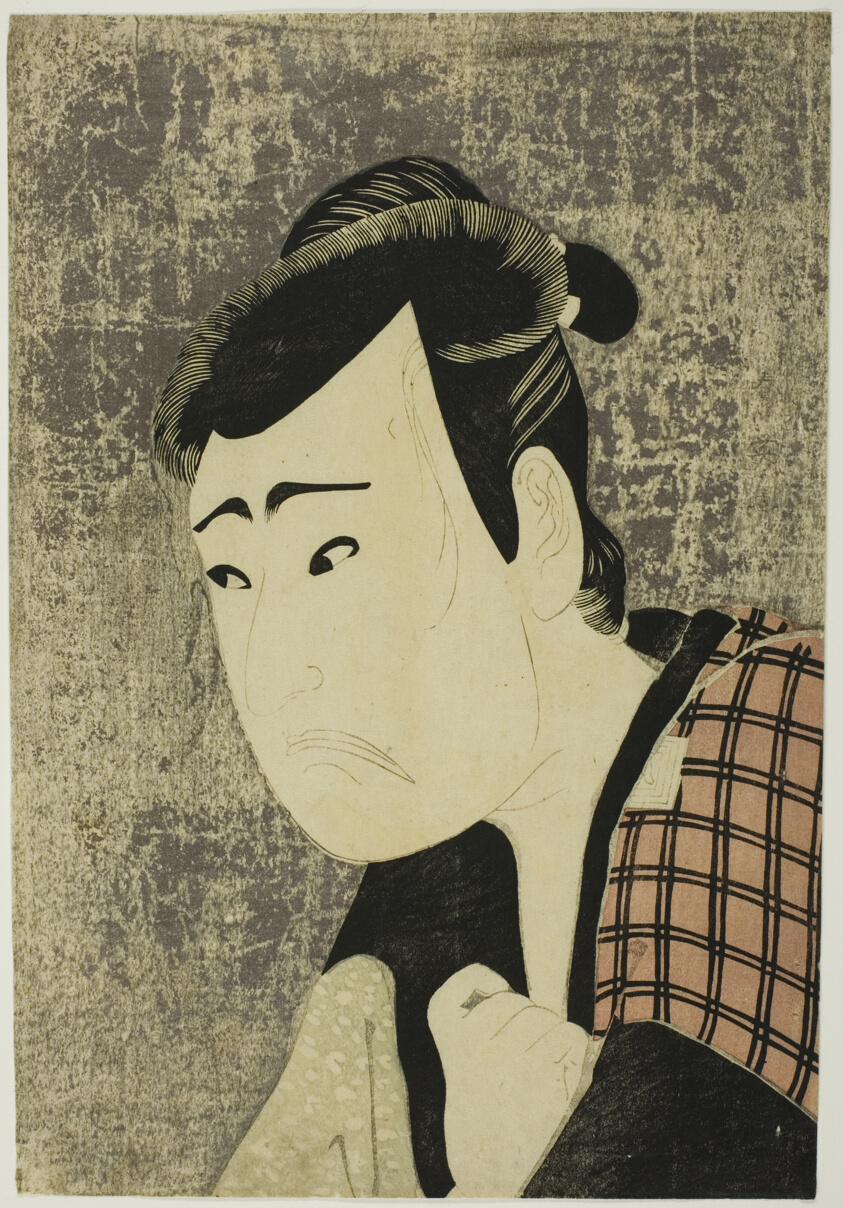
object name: Print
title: Bust Portrait of the Actor Ichikawa Yaozo III as Tanabe Bunzo in the play Hana-ayame Bunroku Soga (Blooming Iris: Soga Vendetta of the Bunroku Era), Performed at the Miyako Theater from the Fifth Day of the Fifth Month, 1794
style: Japanese (culture or style)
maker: Katsukawa Shun'ei (Japanese, 1762-1819)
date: c. 1794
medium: Color woodblock print; aiban; mica background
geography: Japan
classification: woodblock print; print; asian art